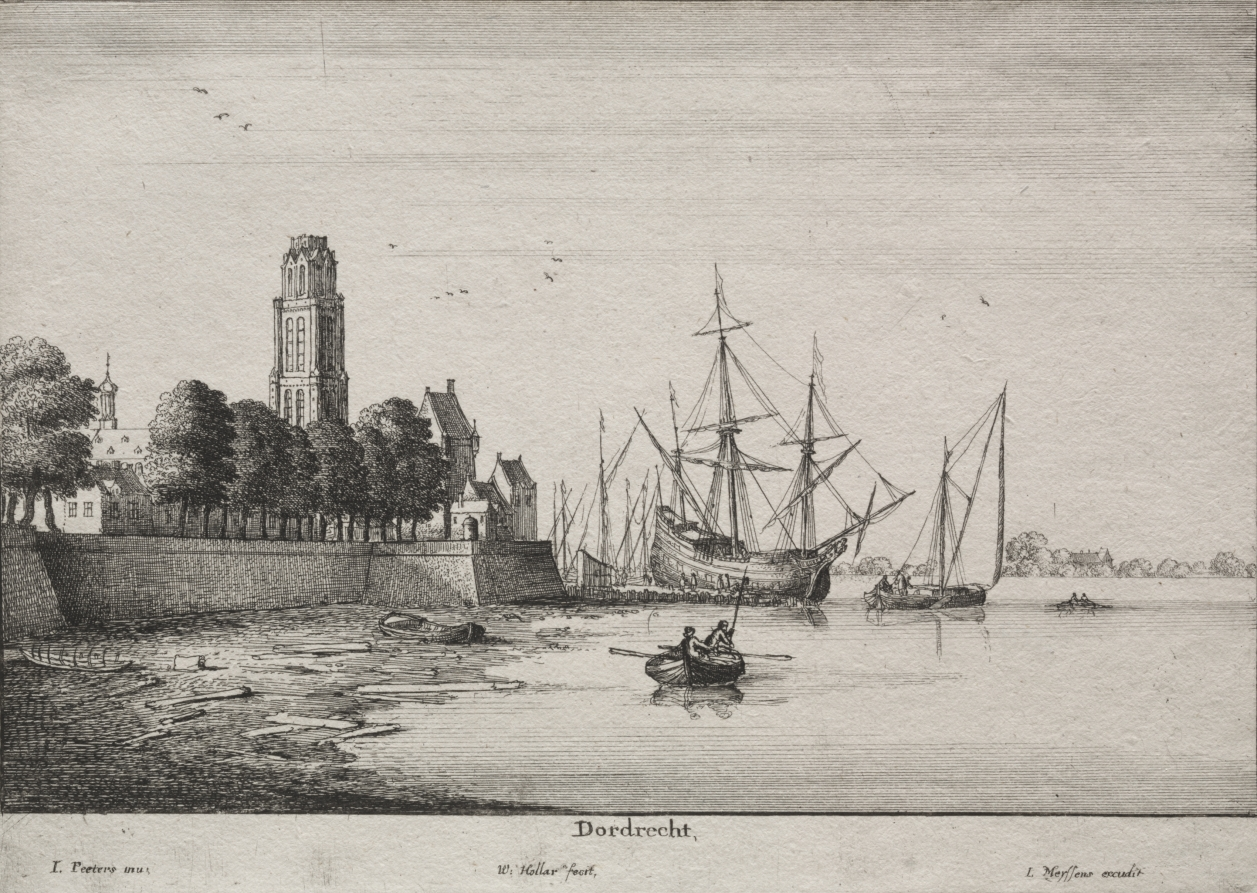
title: Dordrecht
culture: Bohemia, 17th century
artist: Wenceslaus Hollar (Bohemian, 1607–1677)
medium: etching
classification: Print